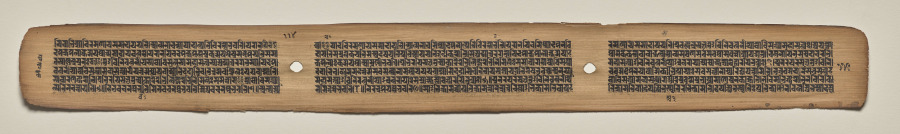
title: Text, Folio 114 (verso), from a Manuscript of the Perfection of Wisdom in Eight Thousand Lines (Ashtasahasrika Prajnaparamita-sutra)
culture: Eastern India, Bihar, Vikramashila Monastery. Painting: Nepal, Kathmandu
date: Sunday, September 14, 1119 (year 239 of the Newar Samvat in the month of Ashvina)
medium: gum tempera and ink on palm leaves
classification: Painting